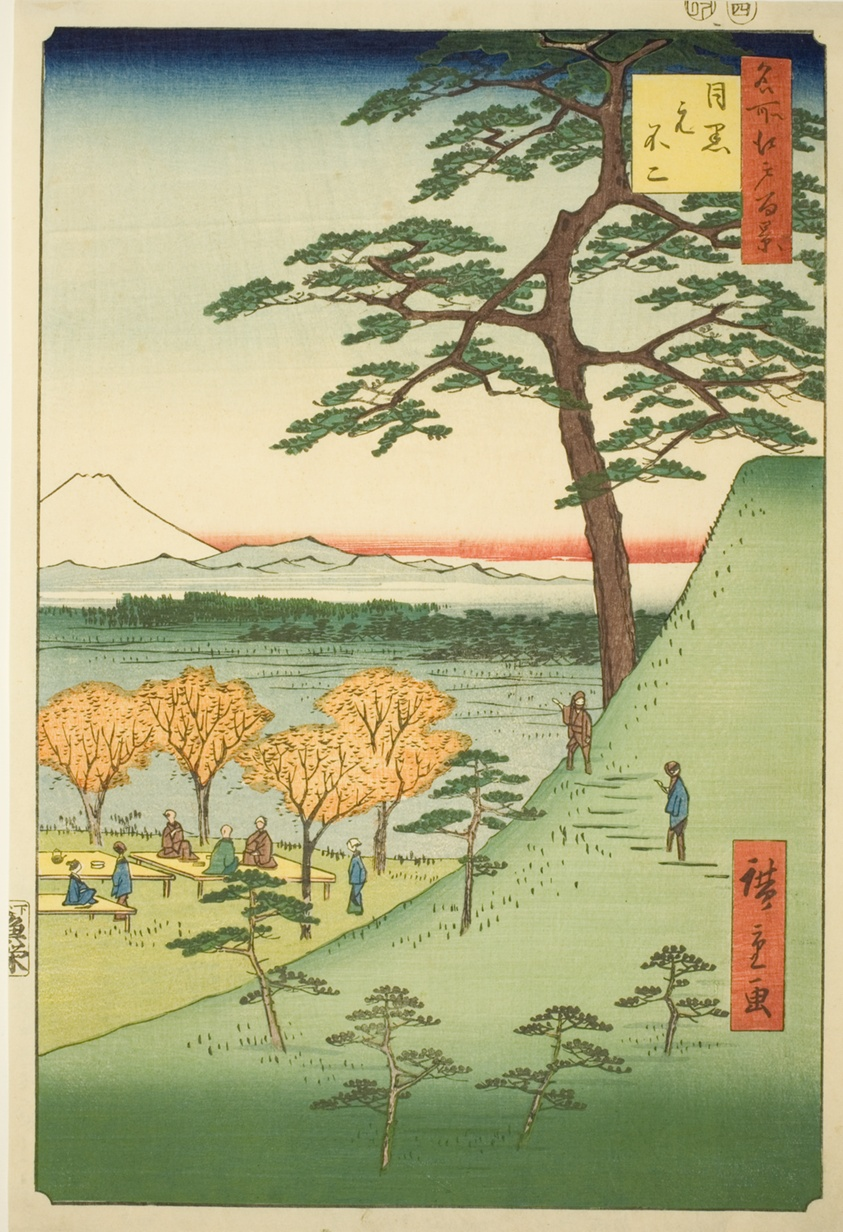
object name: Print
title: Original Fuji, Meguro (Meguro Moto-Fuji), from the series "One Hundred Famous Views of Edo (Meisho Edo hyakkei)"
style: Japanese (culture or style)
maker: Utagawa Hiroshige 歌川 広重; Japanese, 1797–1858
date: 1857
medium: Color woodblock print; oban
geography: Japan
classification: woodblock print; print; asian art